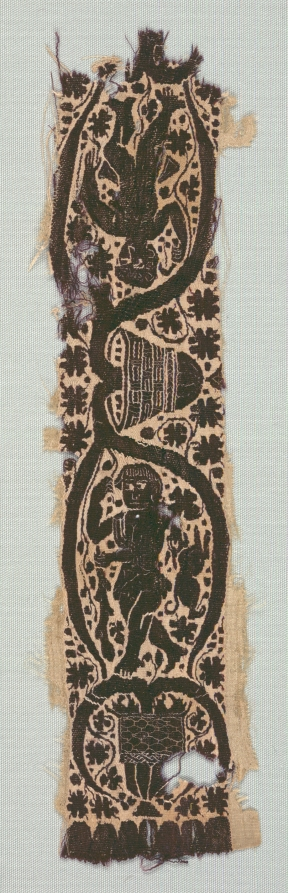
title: Rare Silk Tunic Fragment with Ornamental Sleeve Band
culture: Egypt, Byzantine period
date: 400s-500s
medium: plain weave: silk; tapestry weave with supplementary weft wrapping; undyed linen, dyed wool, silk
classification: Textile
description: This is the only known remnant of a silk tunic among thousands of tapestry-woven decorations that have survived in the dry Egyptian climate. Expensive imported silk, instead of indigenous linen or wool, formed the entire luxurious ground of the tunic, visible along the sides of the fragment. Shiny silk thread also formed some of the details, along with thicker linen thread, on the unusually brilliant purple wool ground. Two males wearing a short garment (chiton) draped over one shoulder appear under vines emanating from baskets. One holds a club with a rabbit beside him; the other bears a staff and a leaf.